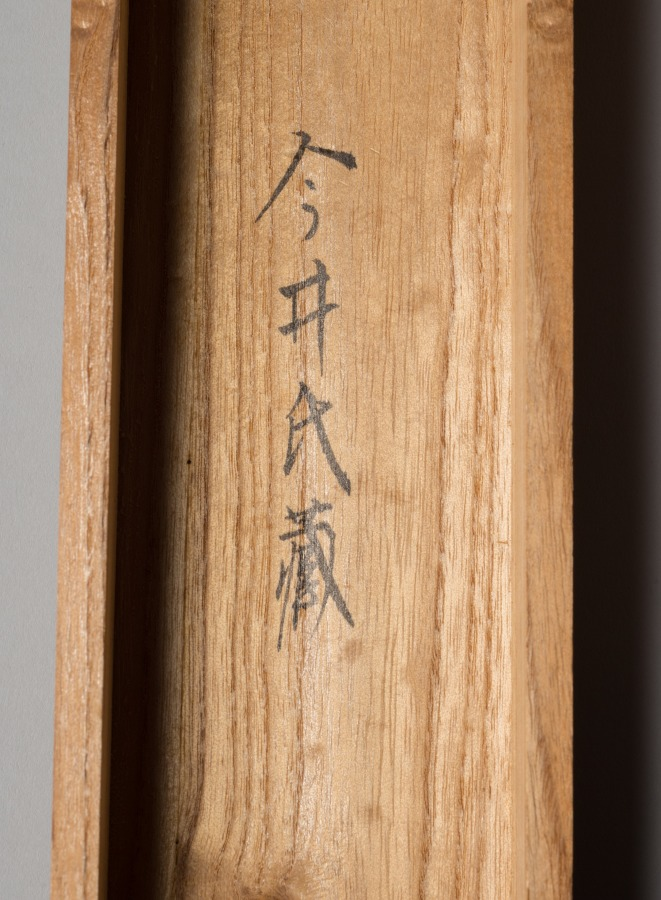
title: Howling Wolf in a Deep Mountain Valley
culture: Japan, Taishō period (1912–26)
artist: Yoshimura Hōryū (Japanese, 1874–1950)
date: 1912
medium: Hanging scroll; ink and color on silk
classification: Painting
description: A wolf howls beneath the tall pines in a misty landscape. The painter was born in the bustling city of Osaka in the Kansai region. He studied with Mori Jihō (1818–1891) and admired the Maruyama school of painters. He was especially gifted at depicting deer, monkeys, tigers, weasels, and other animals.